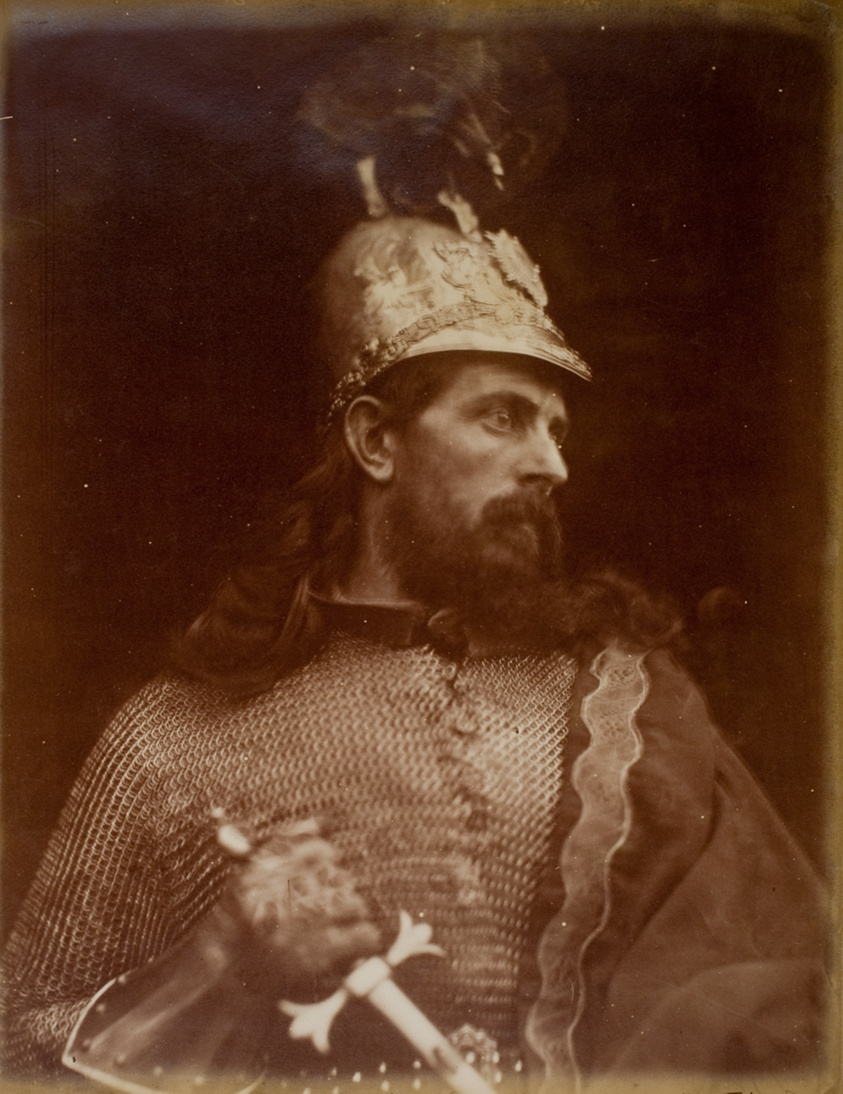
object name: Photograph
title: King Arthur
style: 19th century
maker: Julia Margaret Cameron (English, 1815–1879)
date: 1874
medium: Albumen print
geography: England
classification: photograph; albumen silver print; photography